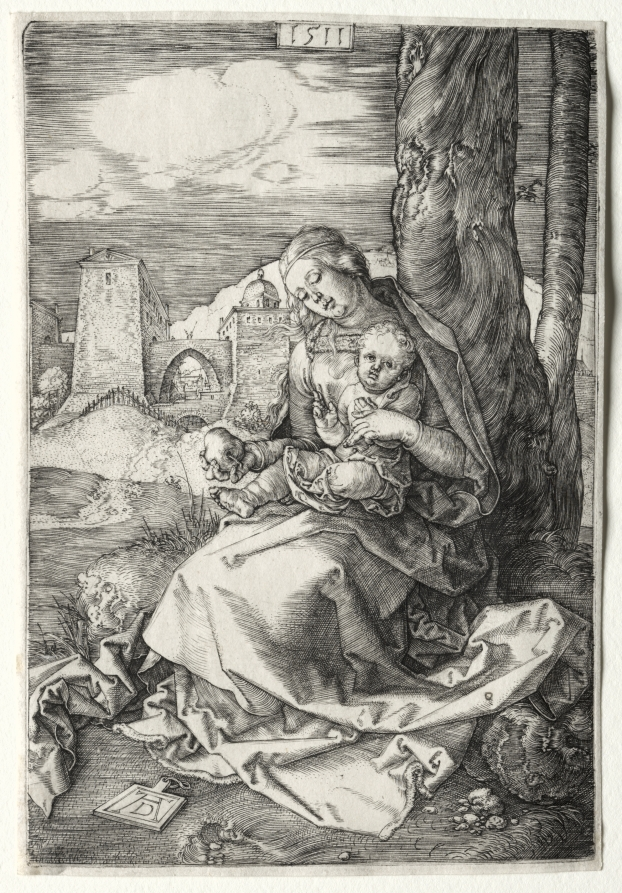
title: The Virgin and Child with the Pear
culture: Germany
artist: Albrecht Dürer (German, 1471–1528)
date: 1511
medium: engraving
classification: Print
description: Dürer portrays the Virgin and Child on an outing away from the city in this relatively casual moment in which they rest beside a tree. As the Christ child looks directly toward the viewer to bestow a blessing, his young mother tries to redirect his attention to the pear in her hand. Here, Dürer emphasizes the natural actions of a mother trying to distract her child. Although Mary knows his holy mission and tragic destiny, she still attempts to prolong her child’s joyful youth with innocent amusements. Dürer demonstrates his further technical and artistic development in this medium through the subtle overall tonality he achieved with light and shadow, particularly in the sky and Mary’s clothing.